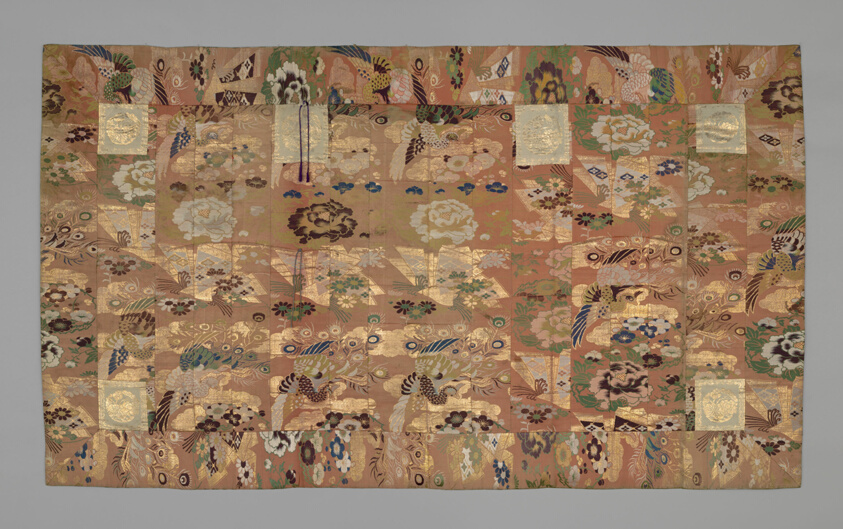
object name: Textile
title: Kesa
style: taisho, showa, meiji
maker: Japan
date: late Edo period (1789–1868), 1801/50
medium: Pieced and appliqued: silk and gold-leaf-over-lacquered-paper strip, warp-float faced 2:1 'Z' twill weave with weft-float faced 1:2 'S' twill interlacings of secondary binding warps and supplementary patterning wefts; lined with silk, plain weave; hand straps of silk, plain weave; cords: silk, plied, knotted, cut fringe, cotton 2:2 oblique twill interlacing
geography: Japan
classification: textile; weaving; liturgical - buddhist